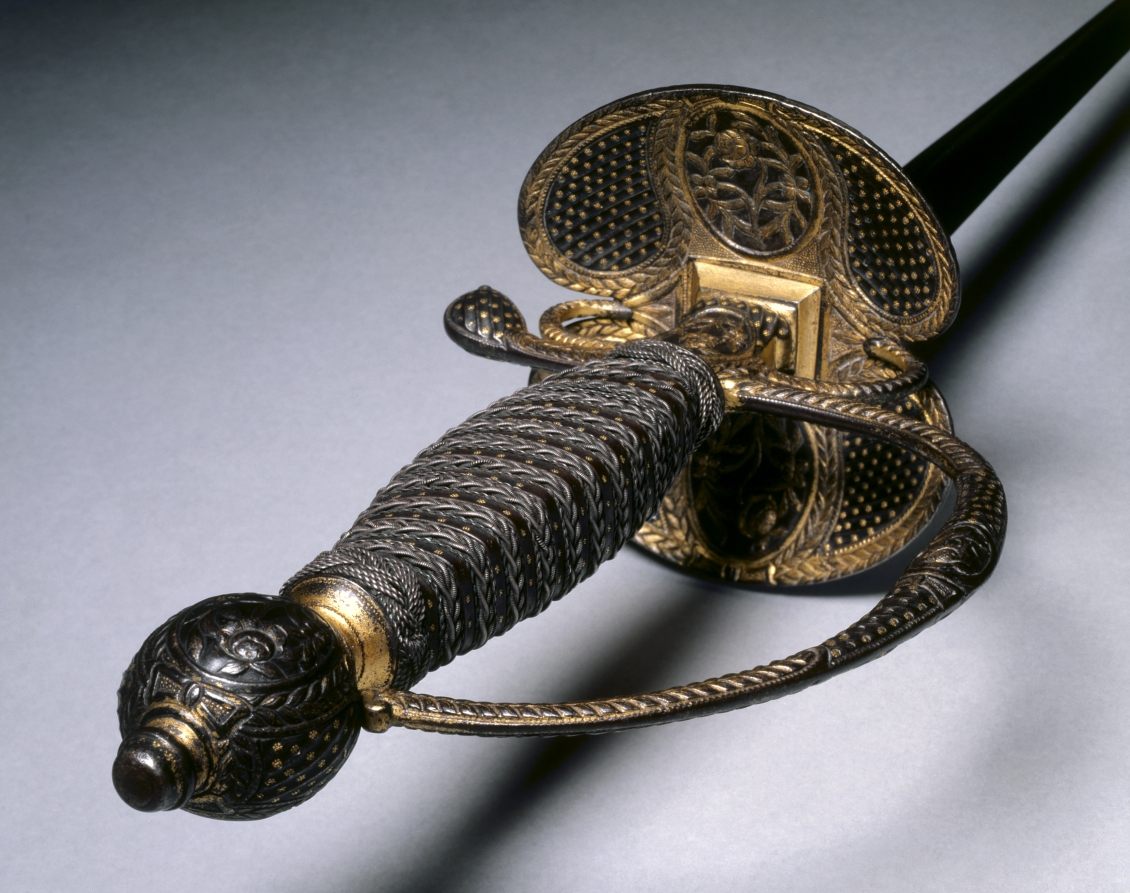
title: Small Sword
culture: France, Paris (?), 18th century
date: c. 1780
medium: forged steel blade; partially gilt and russet steel hilt; steel wire, leather bands, wood core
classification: Arms and Armor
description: During the 1700s, the small-sword emerged as a light, quick weapon. Like the rapier it was carried by unarmored civilians, the noblemen of the upper classes. Over time this delicate sword became more an accessory of male attire than a weapon essential to life and death. The sword hilt, which shows even when the blade is sheathed, became the ground for elaborate decoration. These small-swords thus represent the final stage in the evolution of the sword, from the edged weapons of antiquity to the elegantly refined blades of the 1700s and 1800s.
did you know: The fashion among gentleman for wearing small-swords with everyday attire began to wane by the end of the 1700s with the exception of the military dress sword.